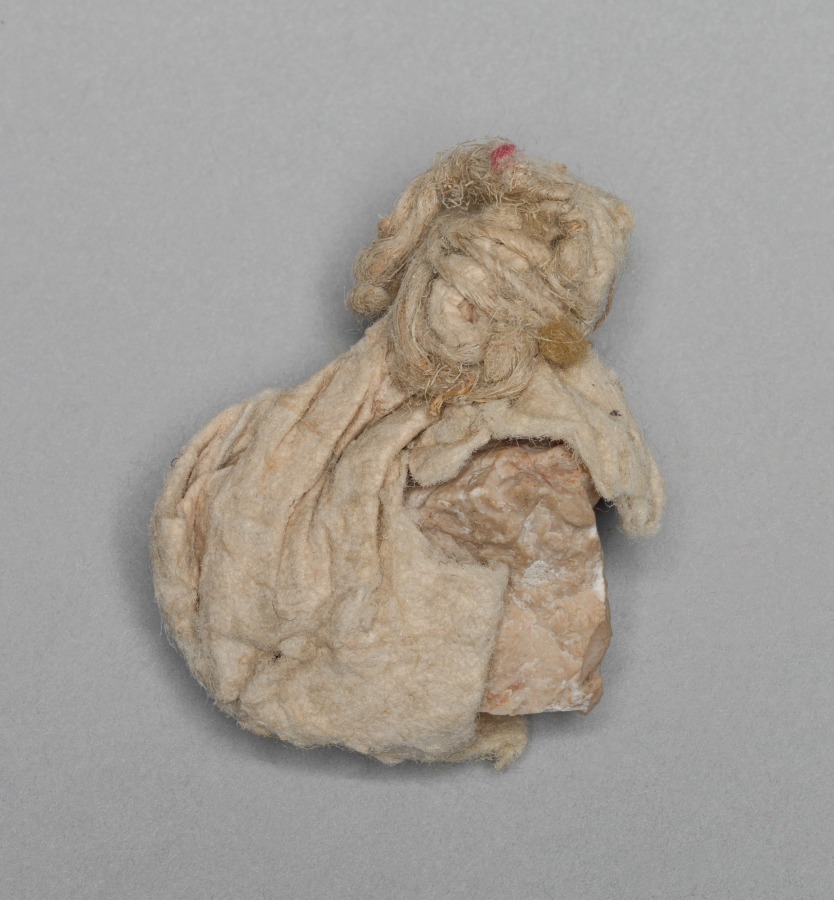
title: Relic of the Stone which Supported the Cross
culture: Germany, Lower Saxony?, Romanesque period, 11th century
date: c. 1045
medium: Limestone, felted fiber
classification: Metalwork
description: This relic is housed inside of the portable altar commissioned by Countess Gertrude of Brunswick, one of the Guelph Treasure’s earliest and most sumptuous objects.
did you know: The accompanying parchment identifies the piece of limestone as a portion of the block used to support the Holy Cross on Mount Golgotha.